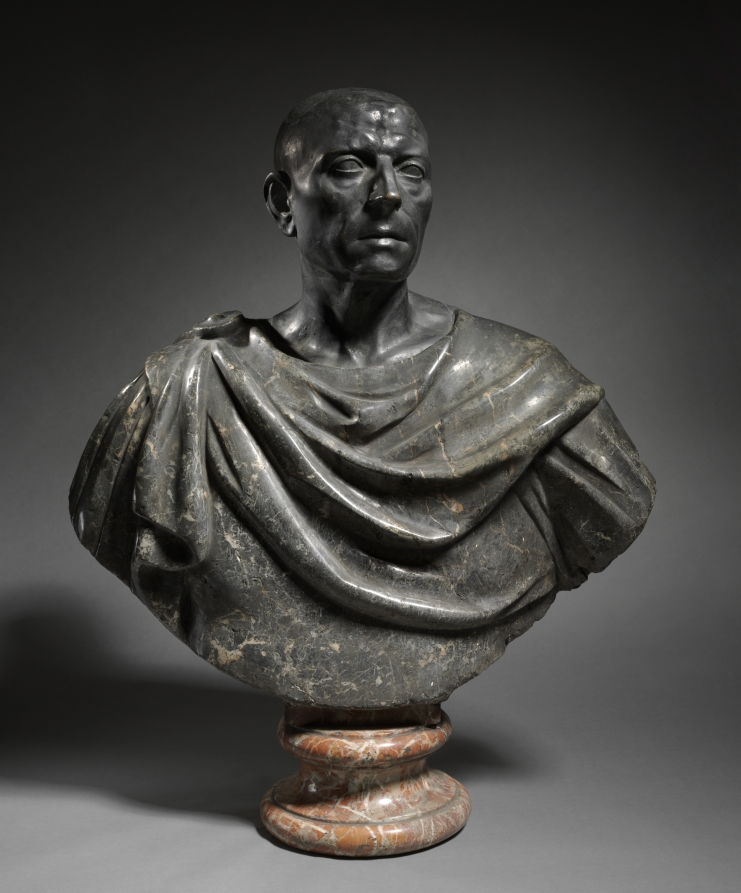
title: Bust of the Ludovisi Cicero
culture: Italy, 17th century or later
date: 1600s or later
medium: marble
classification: Sculpture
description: This work is a variant on the so-called Ludovisi Cicero, a bust in the Uffizi, Florence, that was long-believed to represent the famous Roman orator, but in fact appears to represent an unknown intellectual from the late Roman Republic or early Empire. This interpretation may date as late as the 20th century, and may have been assembled from separate parts.